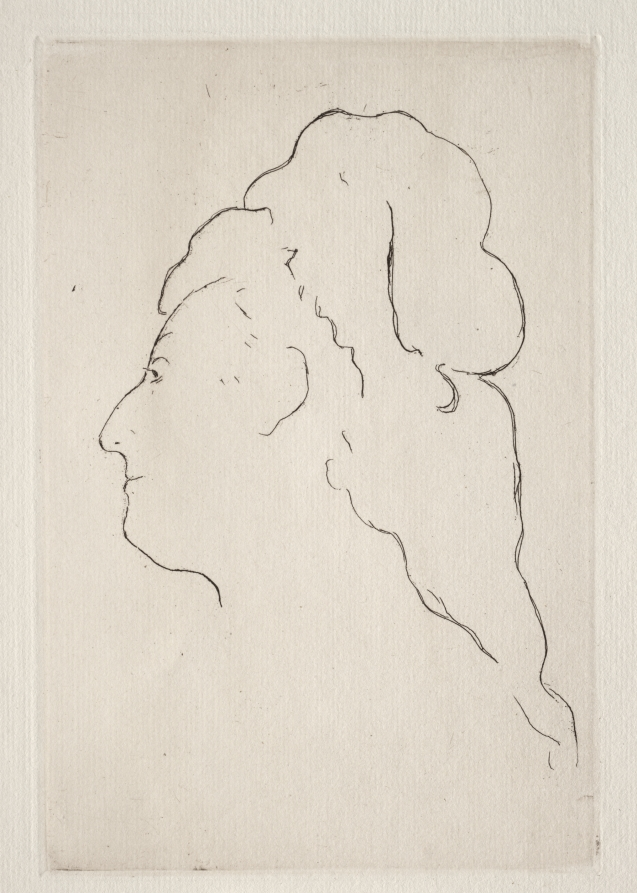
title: Profile of Eva Gonzalès turned to the left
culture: France, 19th century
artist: Édouard Manet (French, 1832–1883)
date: c. 1869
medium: etching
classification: Print